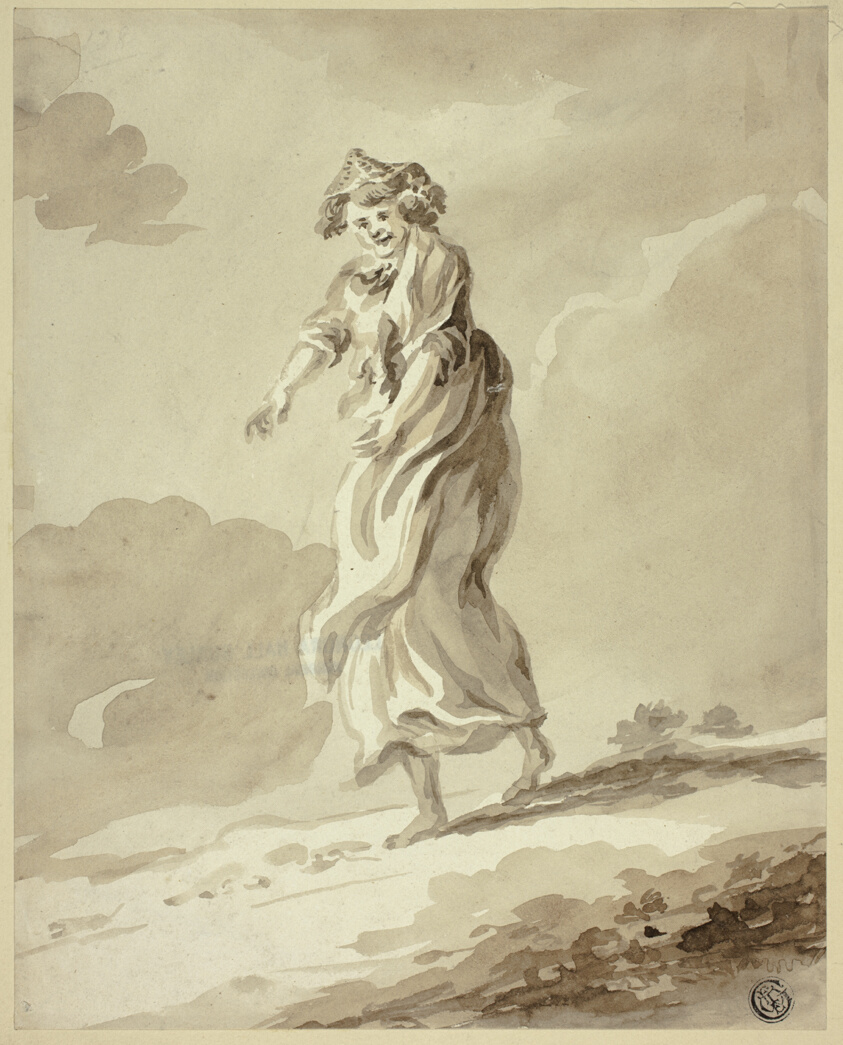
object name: Drawing and Watercolor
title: Woman Wandering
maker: Unknown Artist; English, 19th century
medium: Brush and brown wash, on cream wove paper, perimeter mounted on cream wove paper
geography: England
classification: ink or chalk wash; drawings (visual works); prints and drawing